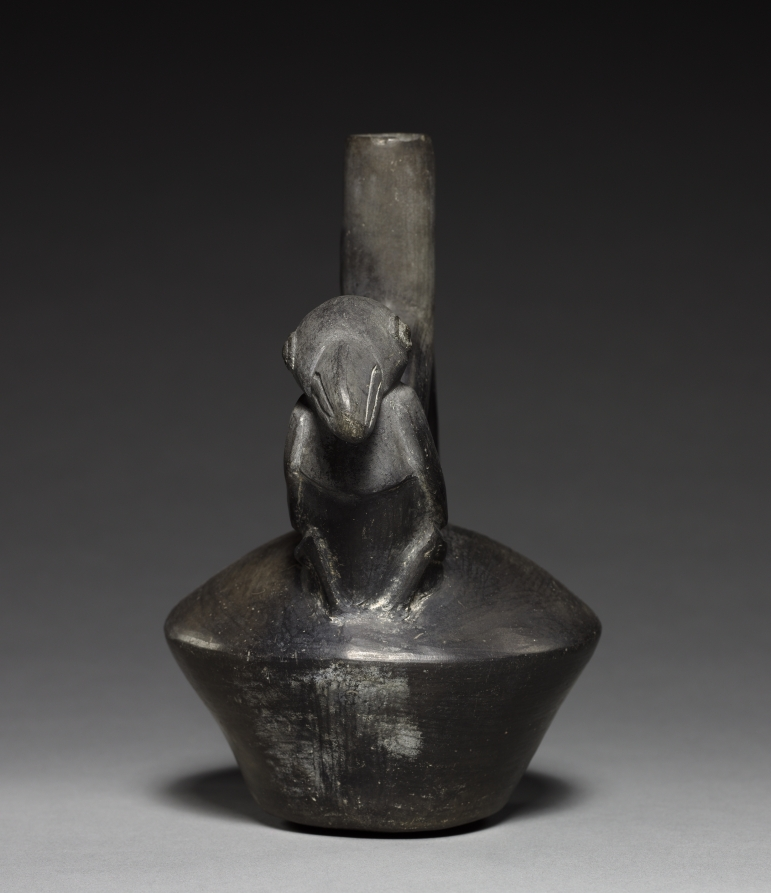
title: Vessel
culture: Peru, Chimú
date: 1300–1400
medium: black ware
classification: Ceramic